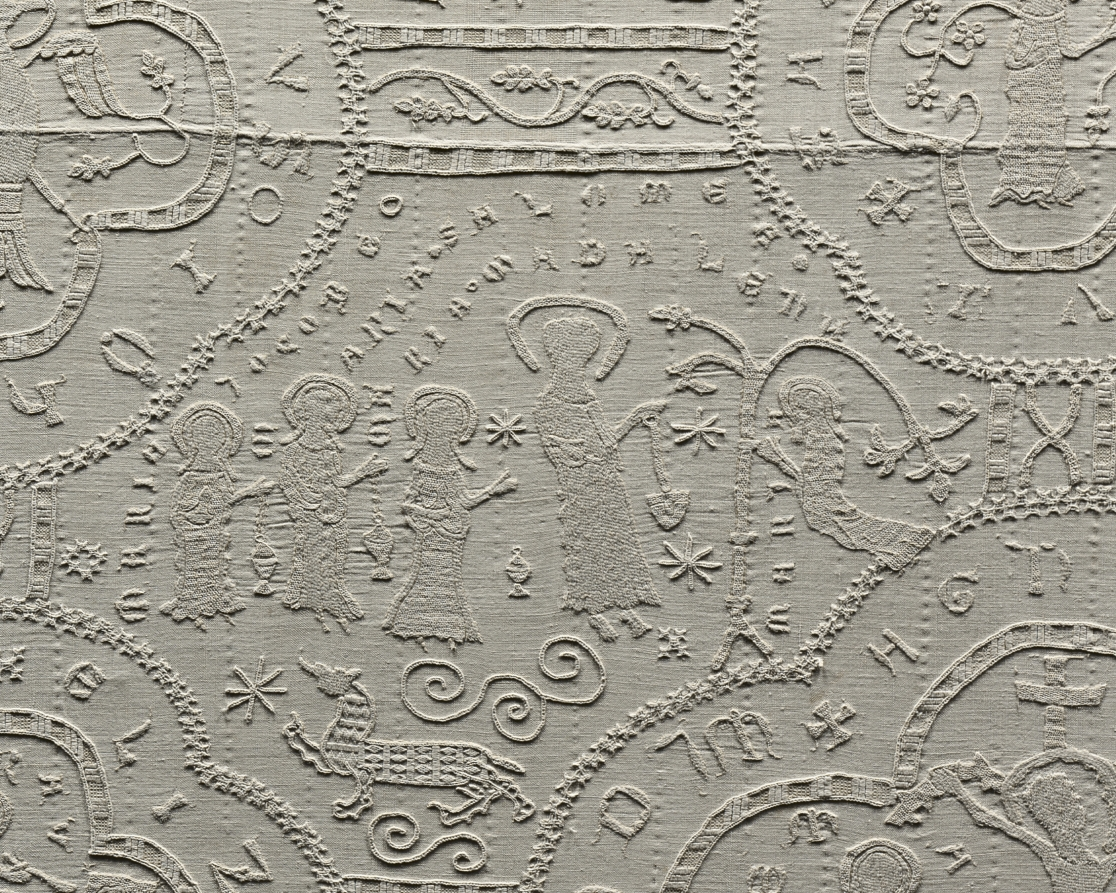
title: Altar Cloth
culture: Germany, Altenberg on the Lahn, Premonstratensian Convent, 14th century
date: c. 1350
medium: embroidery: linen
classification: Embroidery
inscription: various motifs enclosed in quatrefoils with identifying inscriptions in Gothic letters.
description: This large, embroidered altar cloth is one of the rarest, most important medieval church furnishings in existence. It was stitched by nuns in the Premonstratensian Convent in Altenberg on the Lahn River, north of Frankfurt, Germany, and was used to cover the church’s high altar in the weeks leading up to Easter. The cloth is an example of linen embroidery, a specialty of German nuns in the later Middle Ages. The Altenberg monastery church once had valuable furnishings; the high altar retable (a decorated frame with sculptures and paintings on the top of an altar) has survived, the main parts of which are now in the Städel Museum in Frankfurt, Germany.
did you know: When lit from behind, the previously hidden details emerge and the complex design becomes evident.